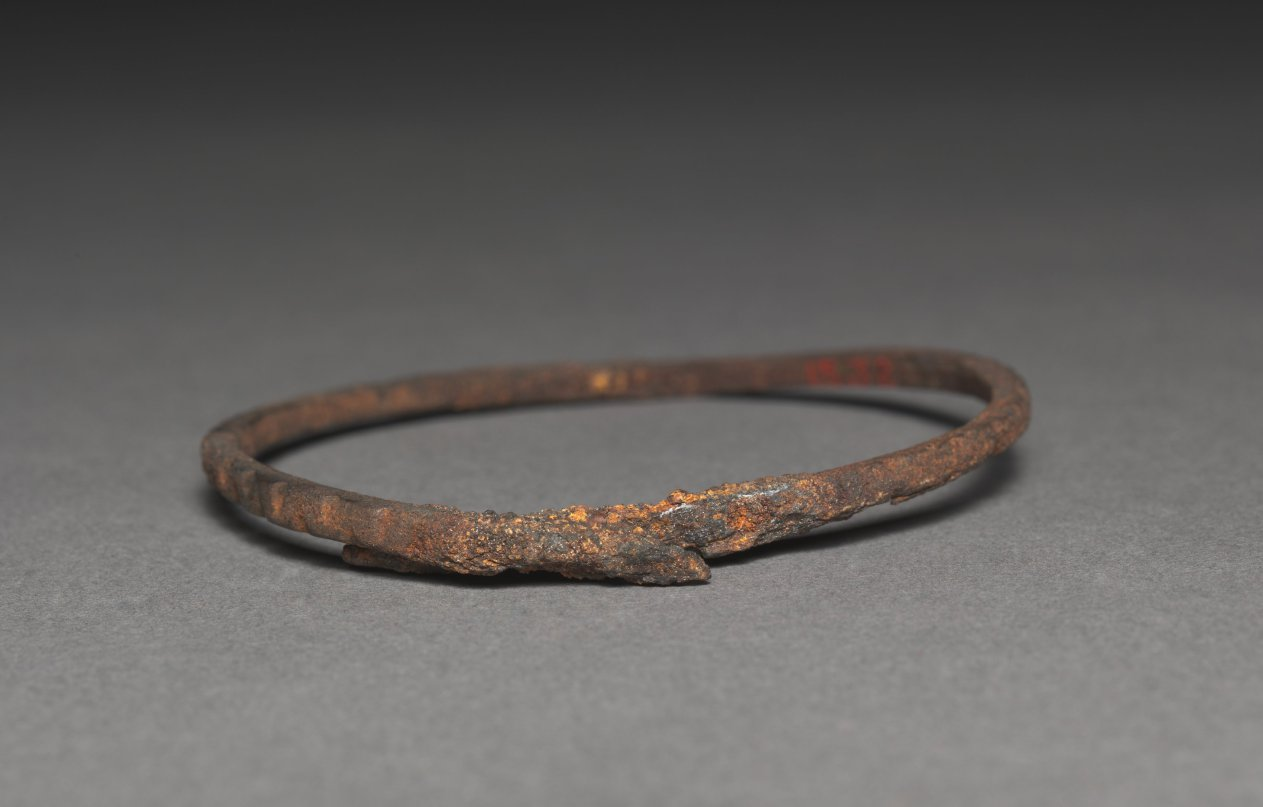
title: Bracelet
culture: Egypt, Greco-Roman period (332 BCE–395 CE), Roman empire (30 BCE–395 CE)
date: 200–400 CE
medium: iron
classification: Jewelry